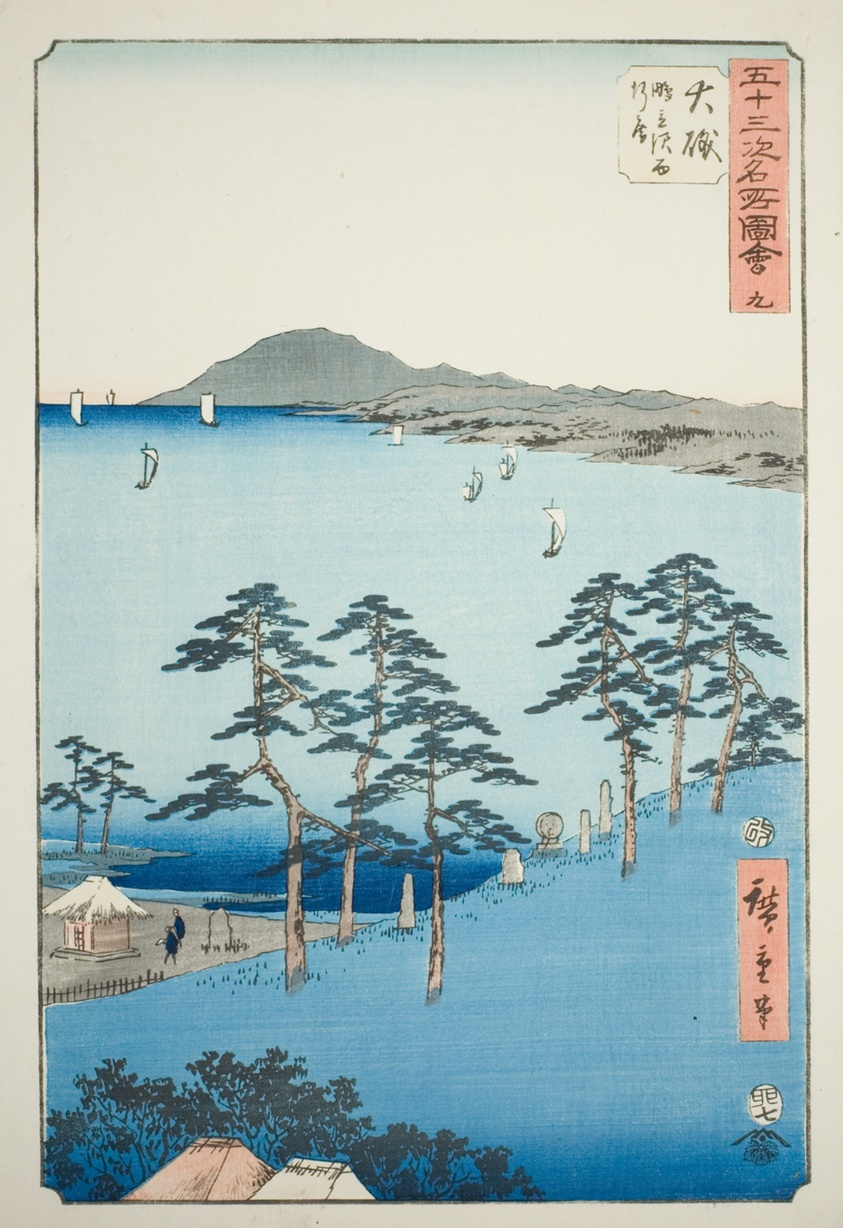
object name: Print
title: Oiso: Saigyo's Hut at Shigitatsu Marsh (Oiso, Shigitatsusawa Saigyoan), no. 9 from the series "Famous Sight of the Fifty-three Stations (Gojusan tsugi meisho zue)," also known as the Vertical Tokaido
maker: Utagawa Hiroshige 歌川 広重; Japanese, 1797-1858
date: 1855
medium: Color woodblock print; oban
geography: Japan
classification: woodblock print; print; asian art